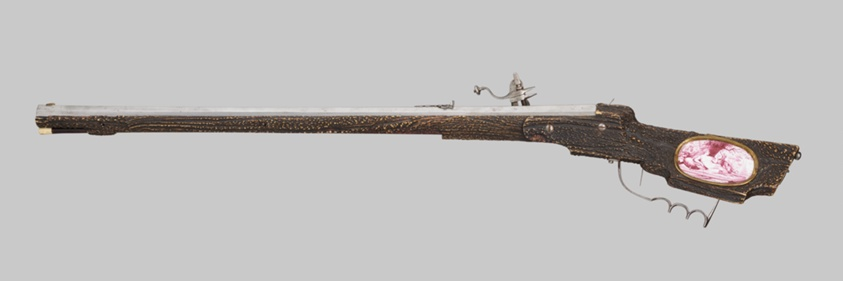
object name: Arms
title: Wheellock Rifle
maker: Elias Becker (German, Augsburg active 1633-1673); Augsburg, Germany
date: c. 1670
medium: Steel, staghorn, cherry wood, beech wood, gilt brass, copper, and enamel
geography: Augsburg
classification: firearm-long gun; arms; decorative arts; european decorative arts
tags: arms